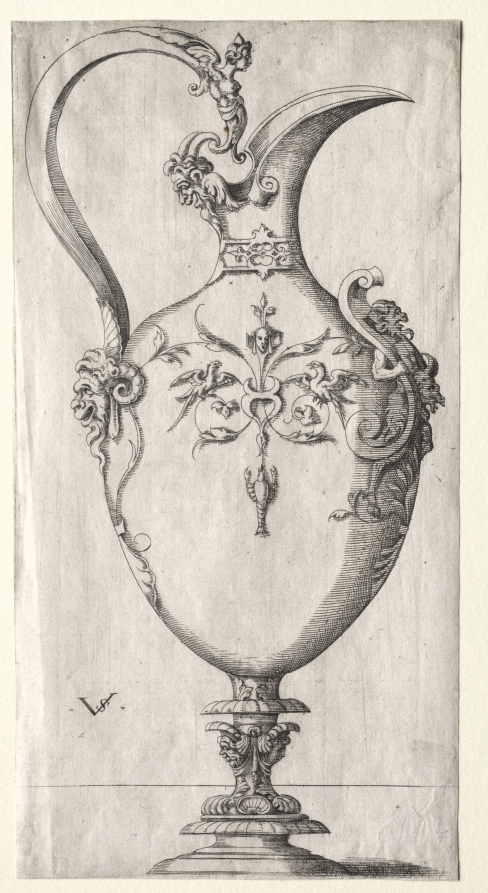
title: Design for a Ewer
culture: Germany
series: Designs for Bowls, Goblets, and Other Vessels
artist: Virgil Solis (German, 1514–1562)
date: 1530–62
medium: etching and engraving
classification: Print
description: The decoration and function of this ewer, or jug, relates to wine. The satyr on the front of the vessel, satyr heads at the handle and mouth, and birds and crayfish on the side are mythological or natural creatures associated with Bacchus and his revelries. The shape is derived from a Greek wine jug called an oinochoe. Made by Virgil Solis, who ran a busy printmaking workshop in Nuremberg, Germany, the print was a model for artists working in other media, such as silver.